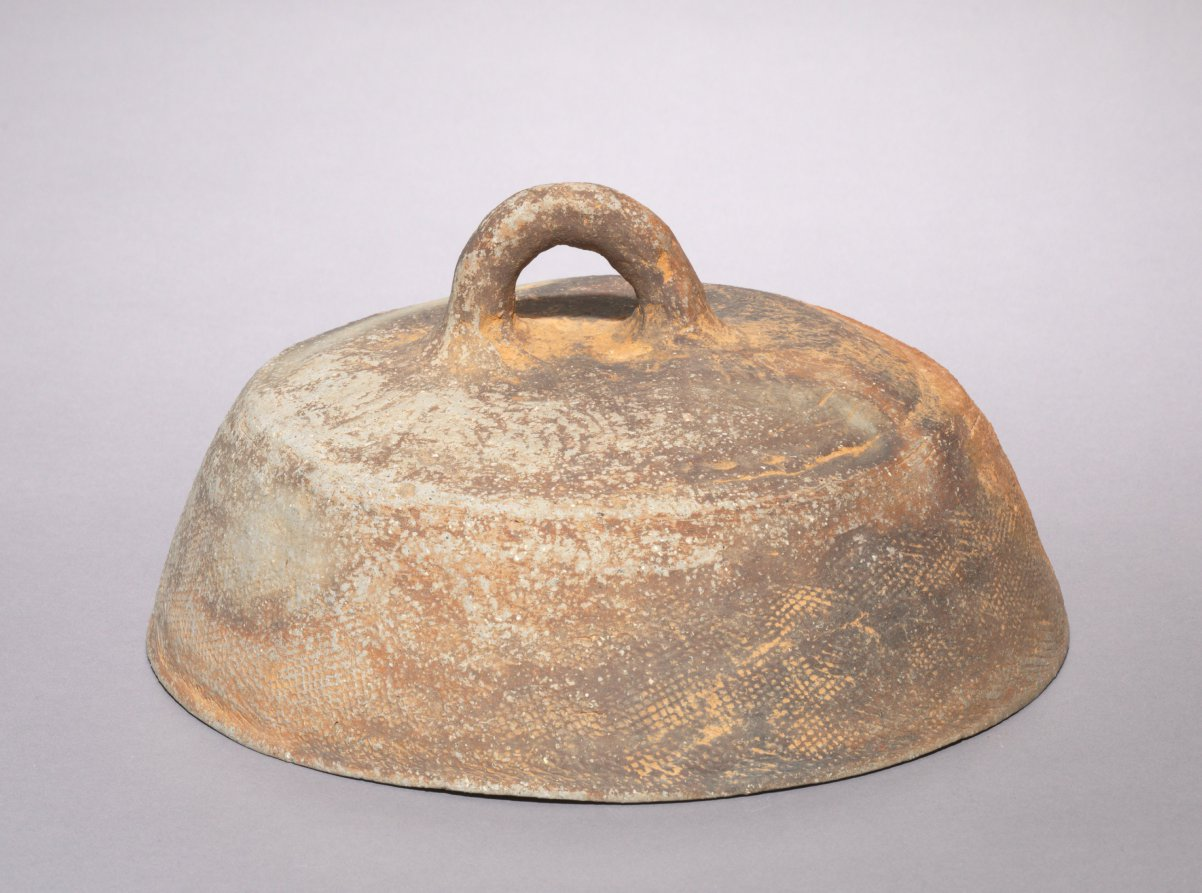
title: Jar with Loop Handle with Overall Impressed Surface Decoration (lid)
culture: Korea, Baekje kingdom (18 BCE–660 CE)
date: 200s–300s CE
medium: earthenware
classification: Ceramic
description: Closed kilns built on hillsides became widely used for producing this type of pottery vessel in Korea during the Three Kingdoms period. Both its gray color and shimmering glaze are the result of the reduction of oxygen in the closed kiln chamber. The pounding technique (tanal in Korean) on the surface strengthened the clay body, leaving behind a geometric pattern.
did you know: Closed kilns built on hillsides became widely used for producing this type of pottery vessel in Korea during the Three Kingdoms period.